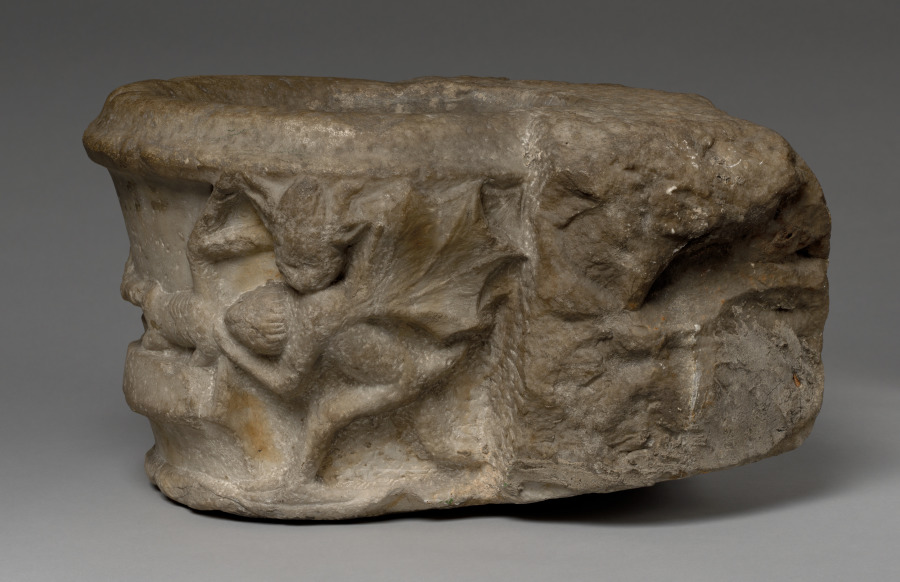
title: Holy Water Font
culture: Southern France, late 15th century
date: late 1400s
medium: marble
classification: Sculpture